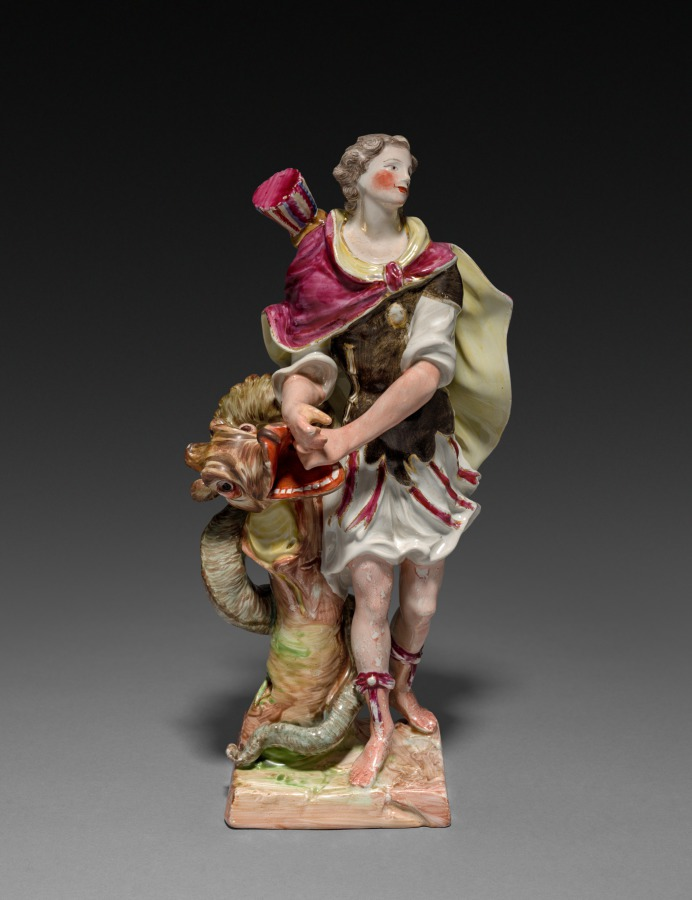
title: Classical Warrior with Serpent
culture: France, 18th century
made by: Sceaux Factory (French, active 1748–66)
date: c. 1770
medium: faience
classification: Ceramic